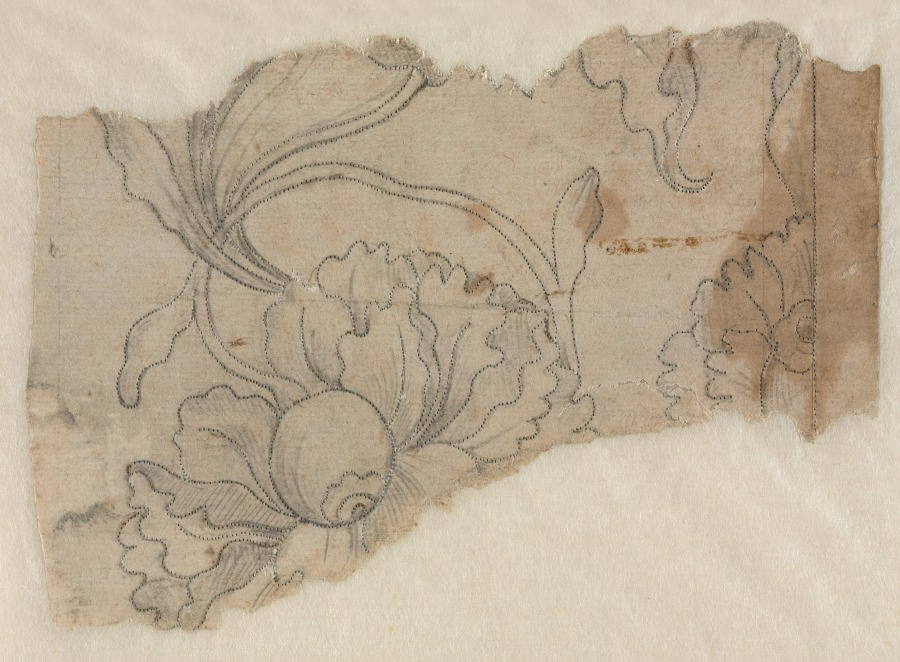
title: Marquetry Design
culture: France, 18th century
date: c. 1730/60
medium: graphite; pricked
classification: Drawing